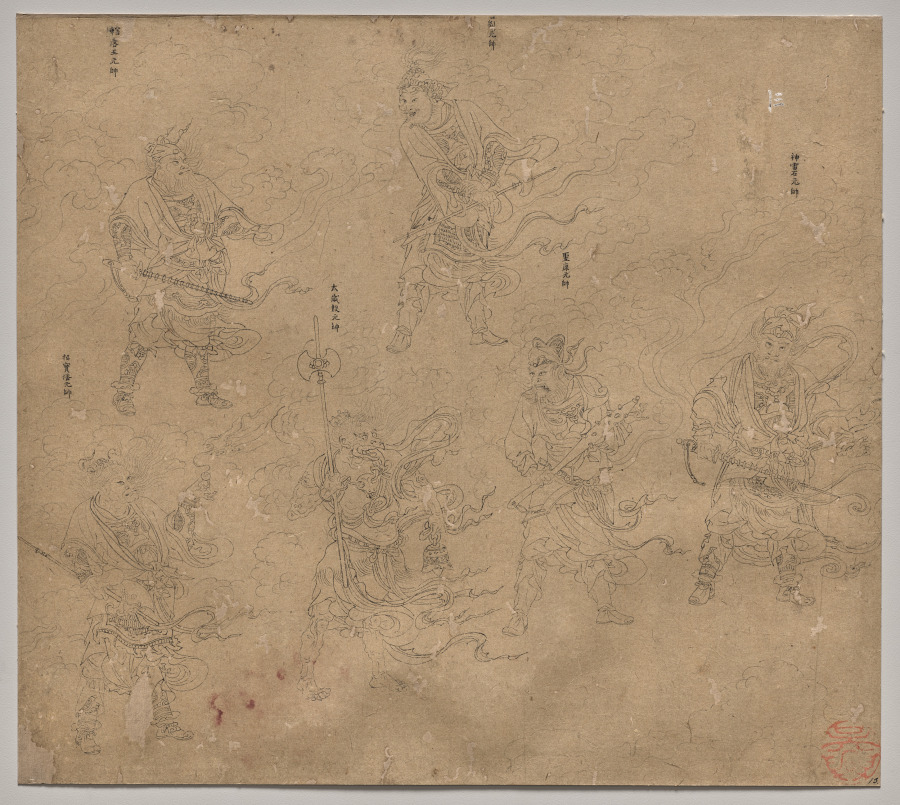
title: Album of Daoist and Buddhist Themes: Procession of Daoist Deities: Leaf 13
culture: China, Southern Song dynasty (1127-1279)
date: 1200s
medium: Album, ink on paper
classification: Painting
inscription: 神雷石元帥; 聖康元帥; 洞神劉元帥 (partially obscured); 太歲殷元帥; 豁落王元帥; 招寶潘元帥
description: These six martial figures are Field Marshals in the Daoist pantheon. In the lower row from left to right are Field Marshals Pan 潘元帥, Yin Jiao 殷郊, Kang Xi 康席, and Shi Shenyu石神毓. Wang E 王惡, and Liu 劉元帥, whose label has been damaged, are in the upper row.